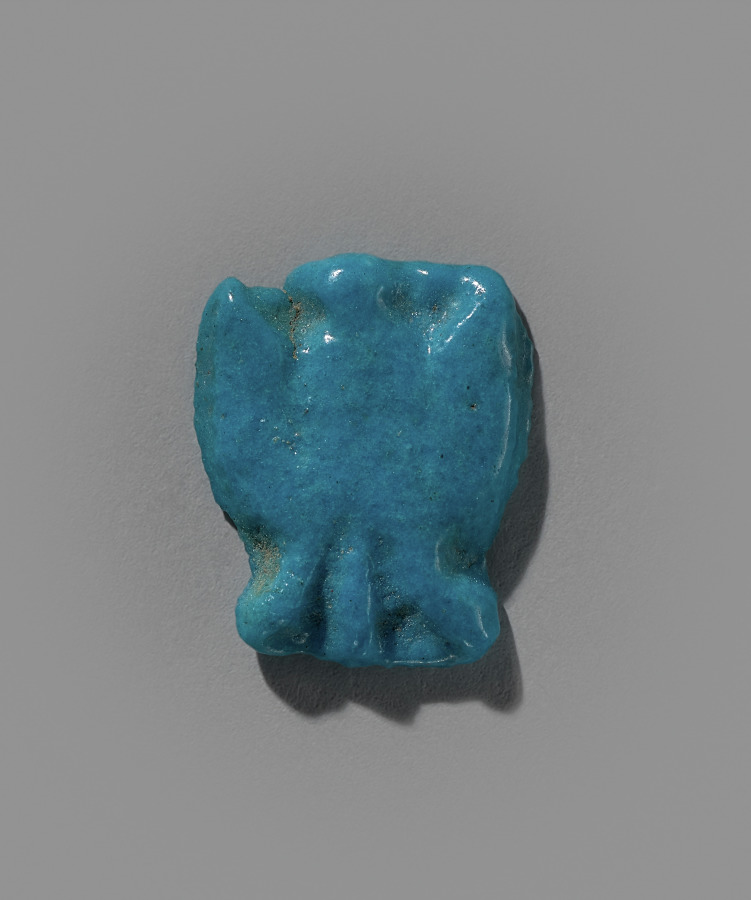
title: Food Model Amulet: Brace of Duck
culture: Egypt, New Kingdom (1540–1069 BCE), Dynasties 19–20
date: 1295–1069 BCE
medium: turquoise faience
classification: Amulets